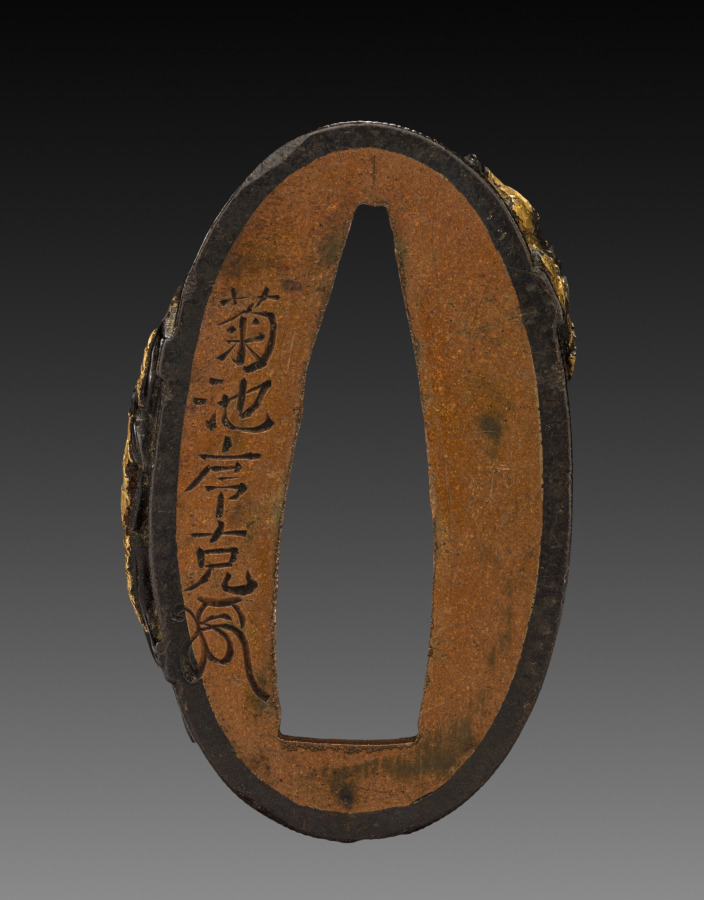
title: Sword-Hilt Collar (Fuchi)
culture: Japan, Edo period (1615–1868)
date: 1700–1850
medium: shakudo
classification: Arms and Armor